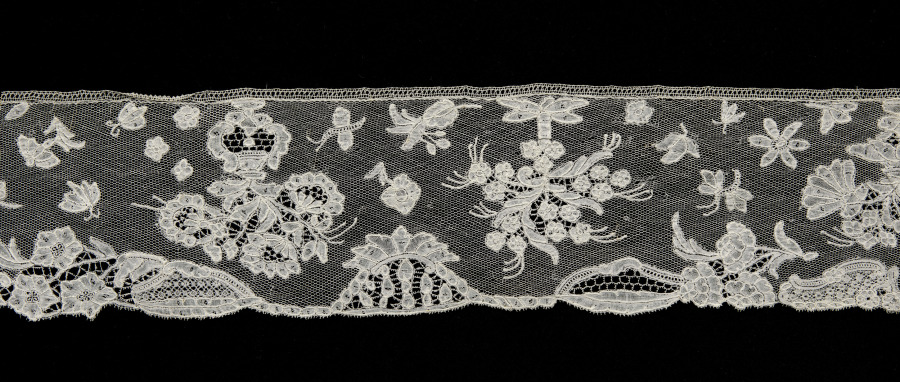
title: Lace Edging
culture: Belgium, Brussels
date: 1740–60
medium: Bobbin lace (Point d'Angleterre)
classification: Lace